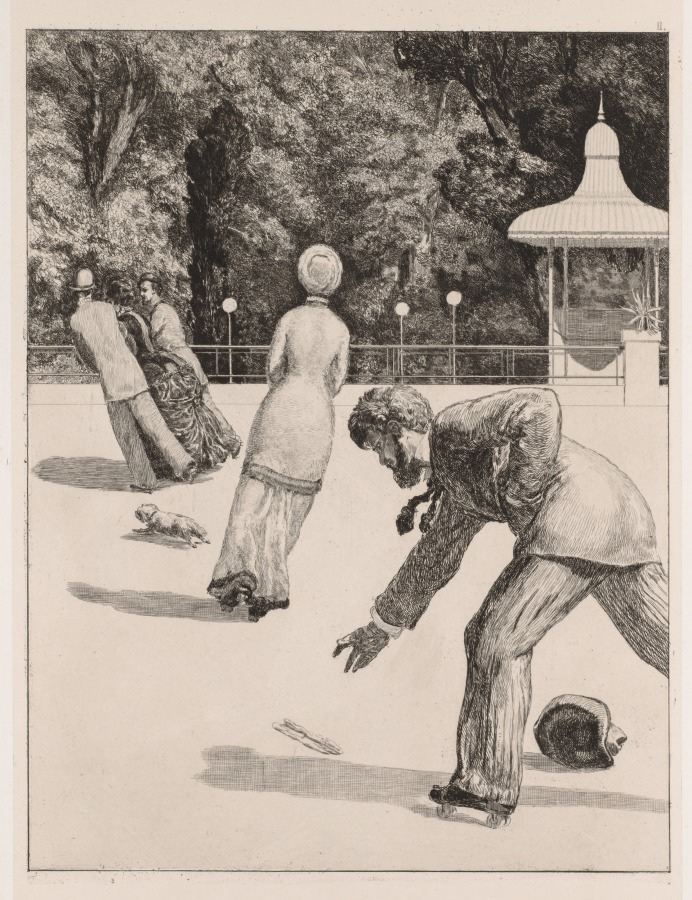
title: A Glove: The Action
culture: Germany, 19th century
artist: Max Klinger (German, 1857–1920)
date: 1880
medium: etching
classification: Print